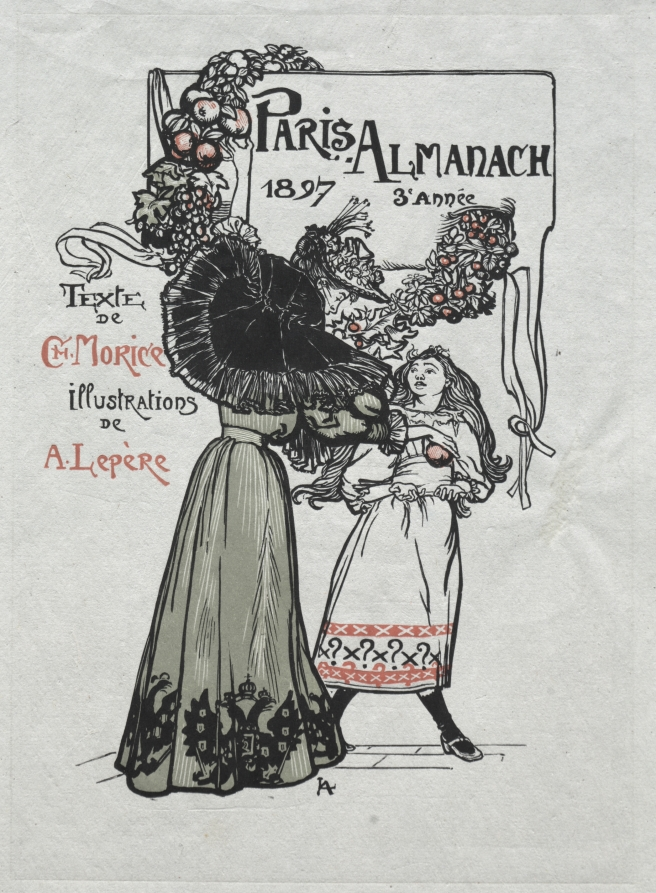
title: Paris Almanac, 1897: Cover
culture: France, late 19th Century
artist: Auguste Louis Lepère (French, 1849–1918)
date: 1897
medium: wood engraving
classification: Print